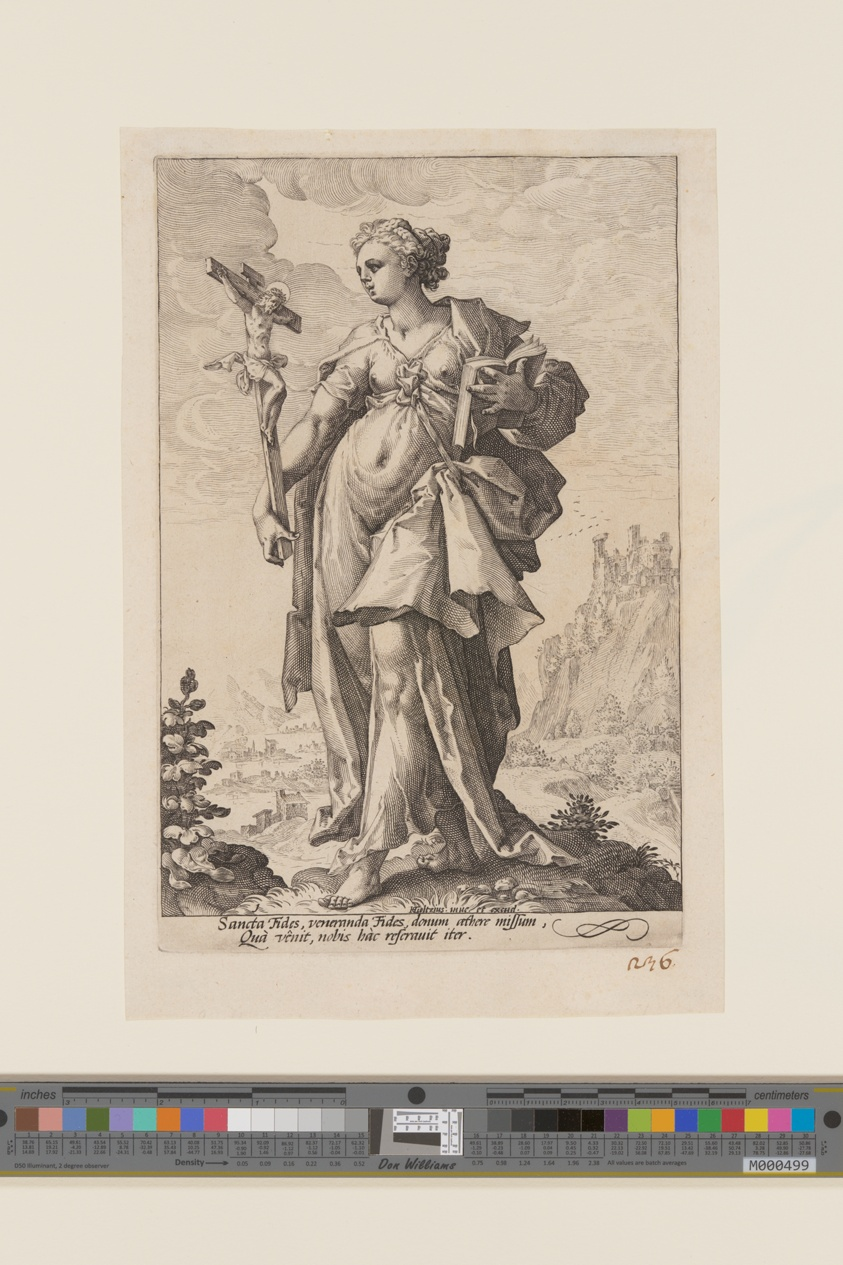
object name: Print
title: Faith, from The Virtues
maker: Jacob Matham (Dutch, 1571–1631); after Hendrick Goltzius (Dutch, 1558–1617)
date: c. 1593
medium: Engraving on ivory laid paper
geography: Netherlands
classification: engraving; paper; print; prints and drawing